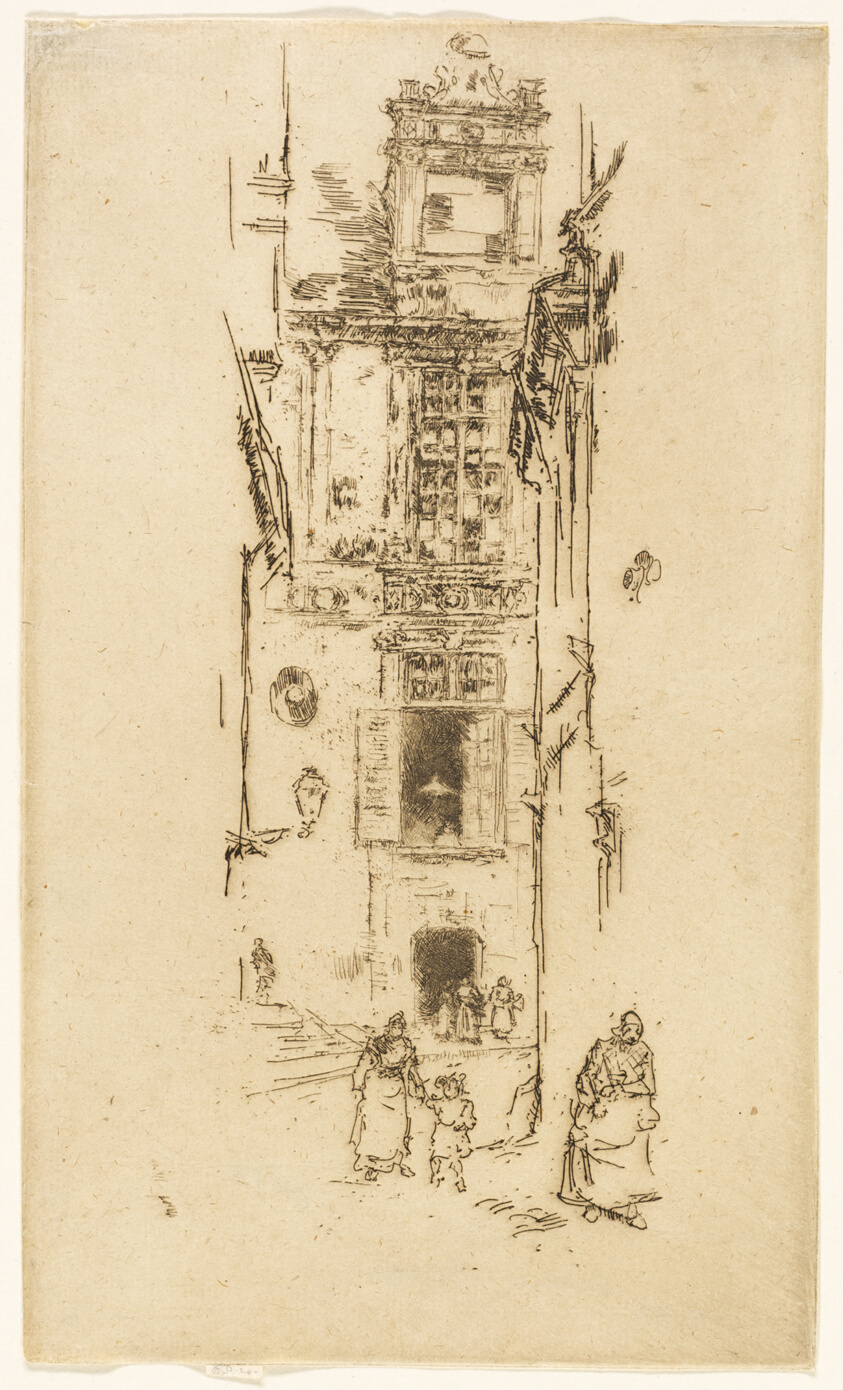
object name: Print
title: Mairie, Loches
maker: James McNeill Whistler (American, 1834-1903)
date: 1888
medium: Etching and drypoint with foul biting in dark brown ink on cream laid paper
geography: United States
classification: etching; foul biting; print; prints and drawing; paper; drypoint